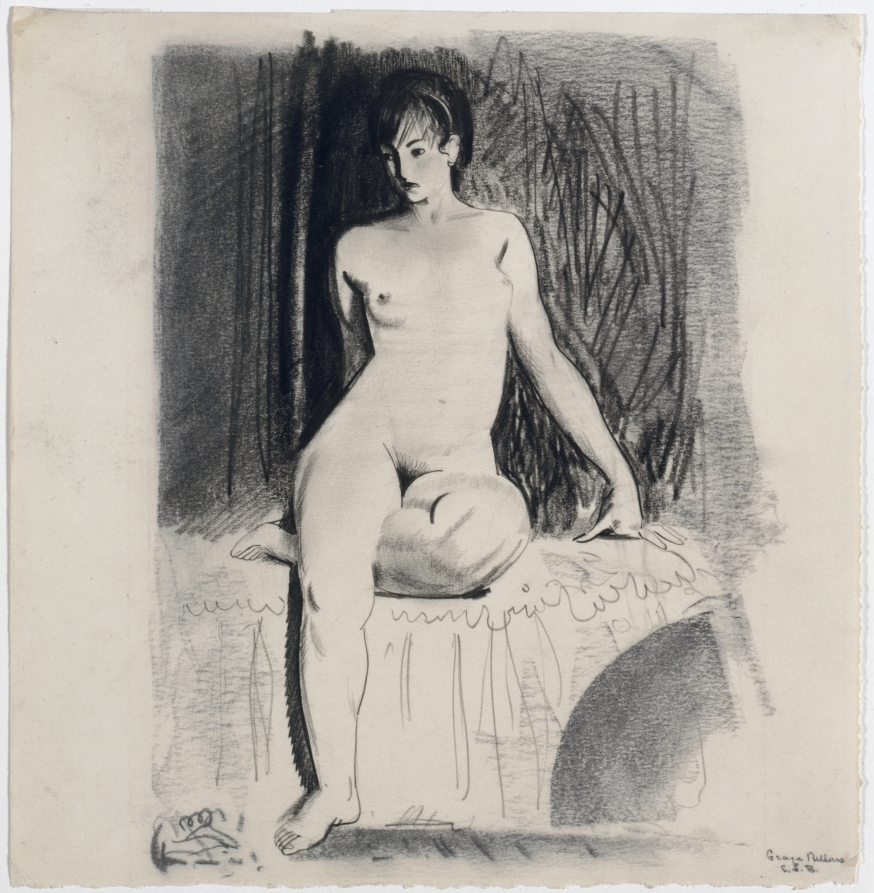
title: Seated Female Nude (Emma Story Bellows)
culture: America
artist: George Bellows (American, 1882–1925)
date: after 1910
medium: black lithographic crayon with traces of stylus (above head)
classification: Drawing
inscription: signed, lower right, in graphite: George Bellows / E. S. B.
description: Bellows achieved fame as a young man for his powerful boxing scenes and images of urban life, but he also produced sensitive drawings and paintings of women. Bellows married Emma Story in 1910.